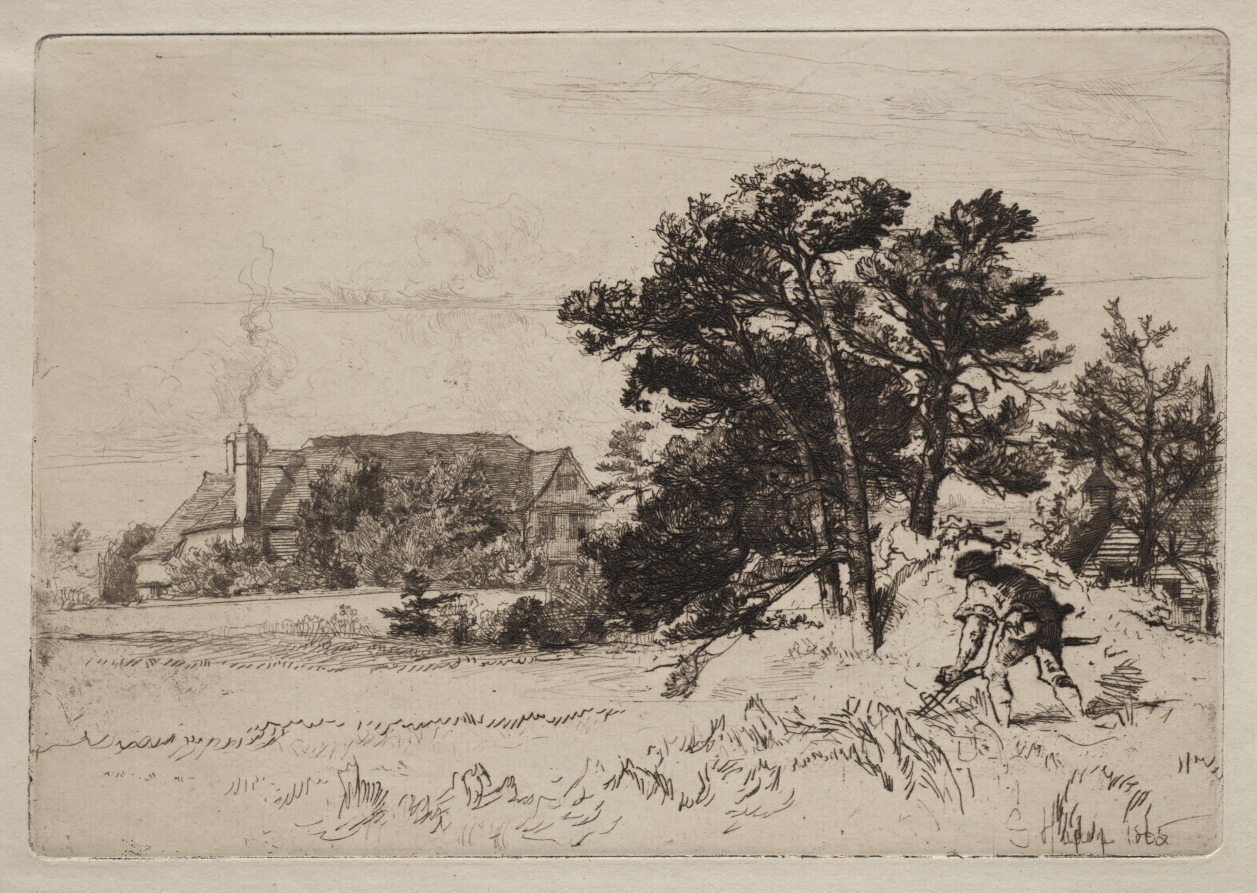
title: Old Willesley House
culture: England, 19th century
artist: Francis Seymour Haden (British, 1818–1910)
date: 1865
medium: etching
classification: Print